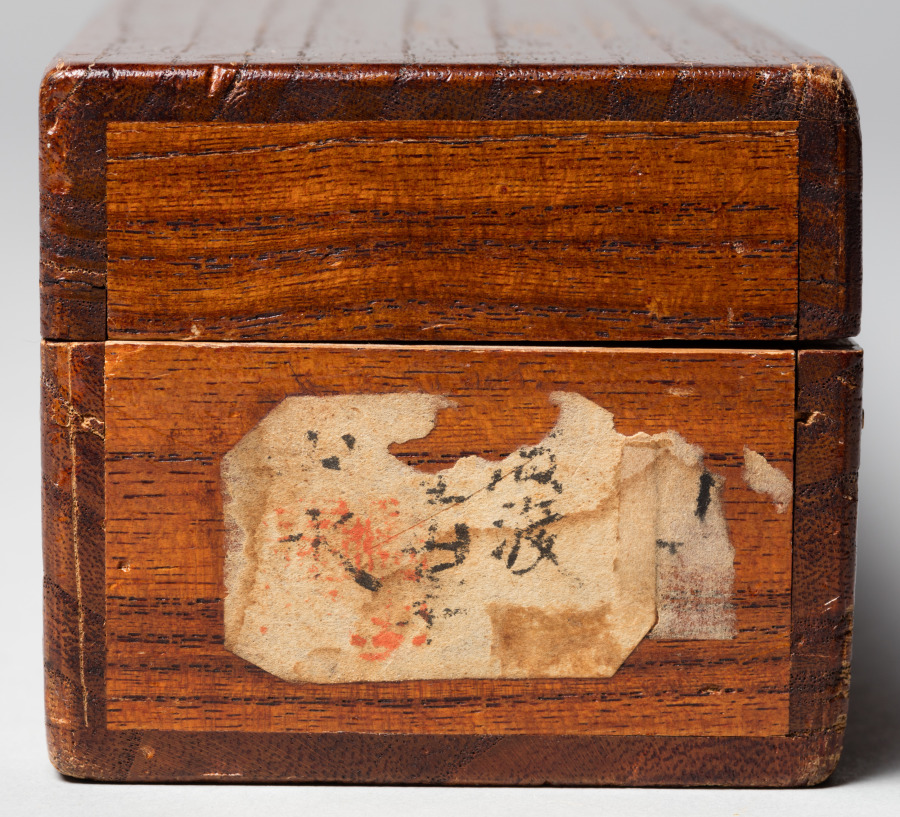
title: Mountain and River in Storm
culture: Japan, Edo period (1615–1868)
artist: Hirowatari Setsuzan (Japanese, ?-1674)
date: early to mid-1600s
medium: hanging scroll; ink on paper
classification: Painting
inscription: signed: Setsuzan hitsu